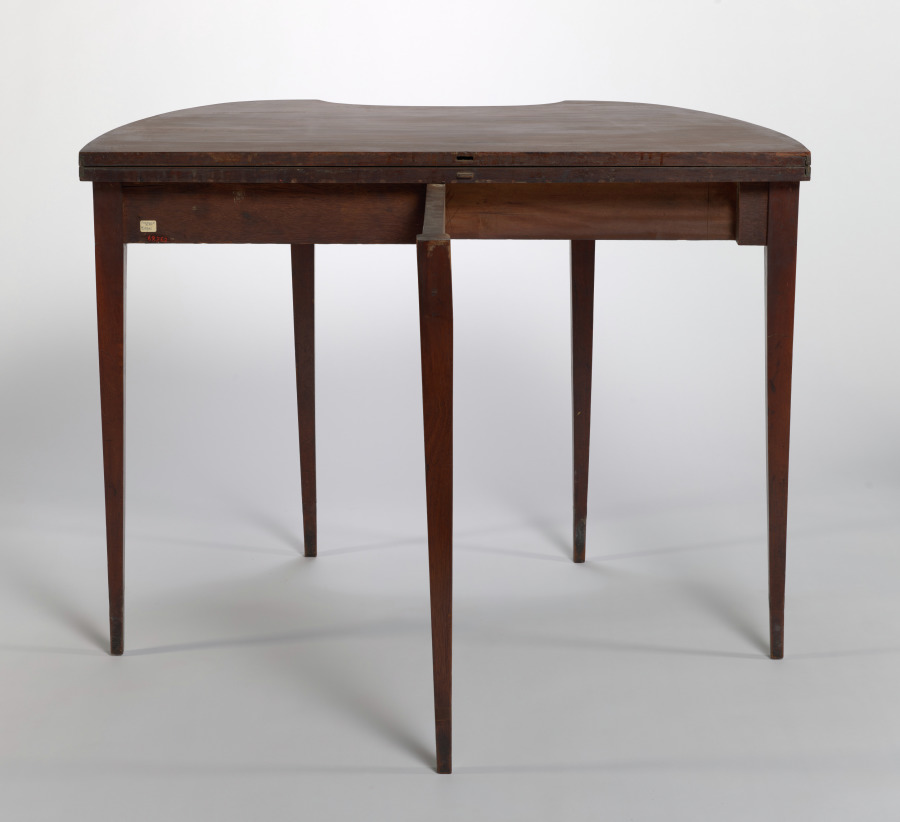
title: Game Table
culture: America, Maryland, Baltimore, early 19th Century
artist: style of George Hepplewhite (American, 1786)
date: c. 1800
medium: mahogany with inlays of various woods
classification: Furniture and woodwork